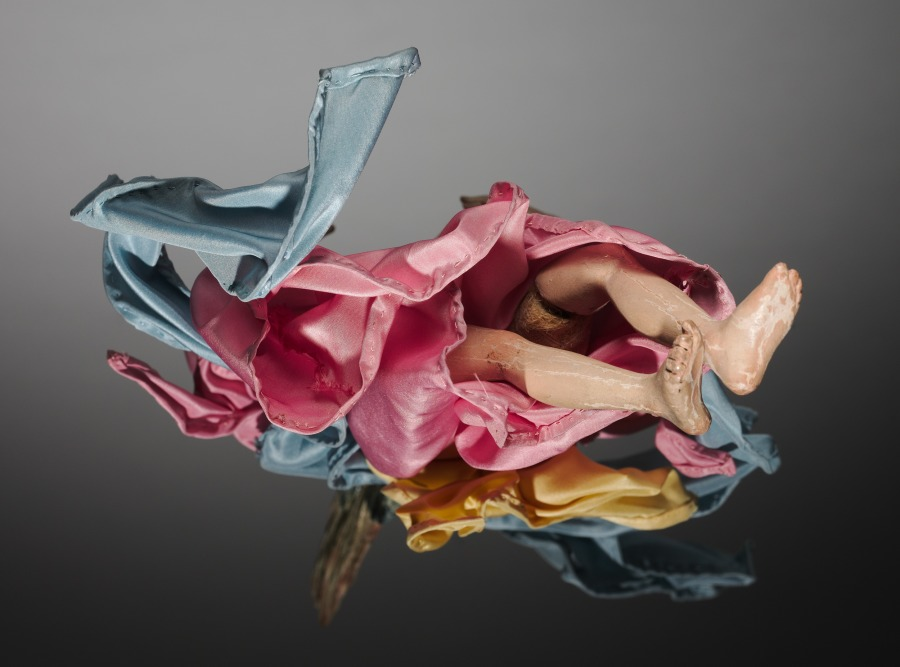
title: Figure from a Crèche: Angel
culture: Italy, Naples, late 18th-early 19th century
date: 1780–1830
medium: painted wood and terracotta with various textiles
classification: Sculpture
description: The practice of creating scenes of the Nativity for the home dates from the early 1700s in Italy, where people began to set up doll-like figures of about a foot or less in height. The custom was particularly popular in Naples around 1800, where crèche scenes (crèche means cradle, or crib) included many figures, whose heads and hands of painted terracotta, stuffed cloth bodies, and clothing adapted from contemporary local costumes gave them an amazingly realistic character. Representations of the birth of Jesus can be traced to the first few centuries of Christianity. Both living creatures and sculptural depictions of them were used from early times. By the late middle ages it was customary to create life-size figures of wood or stone, naturalistically painted, to represent the characters who participated in the events of Jesus's early life. These sculptures were then arranged in scenes illustrating one or both of the most important of these events, the Adoration of the Shepherds and the Adoration of the Magi-the three kings from the East who came to pay homage to the Christ child. Used in churches, these large figures were especially popular in Italy, Central Europe, Spain, and Portugal. This Object in Focus presentation was organized by Henry Hawley, Curator of Renaissance and Later Decorative Arts and Sculpture.